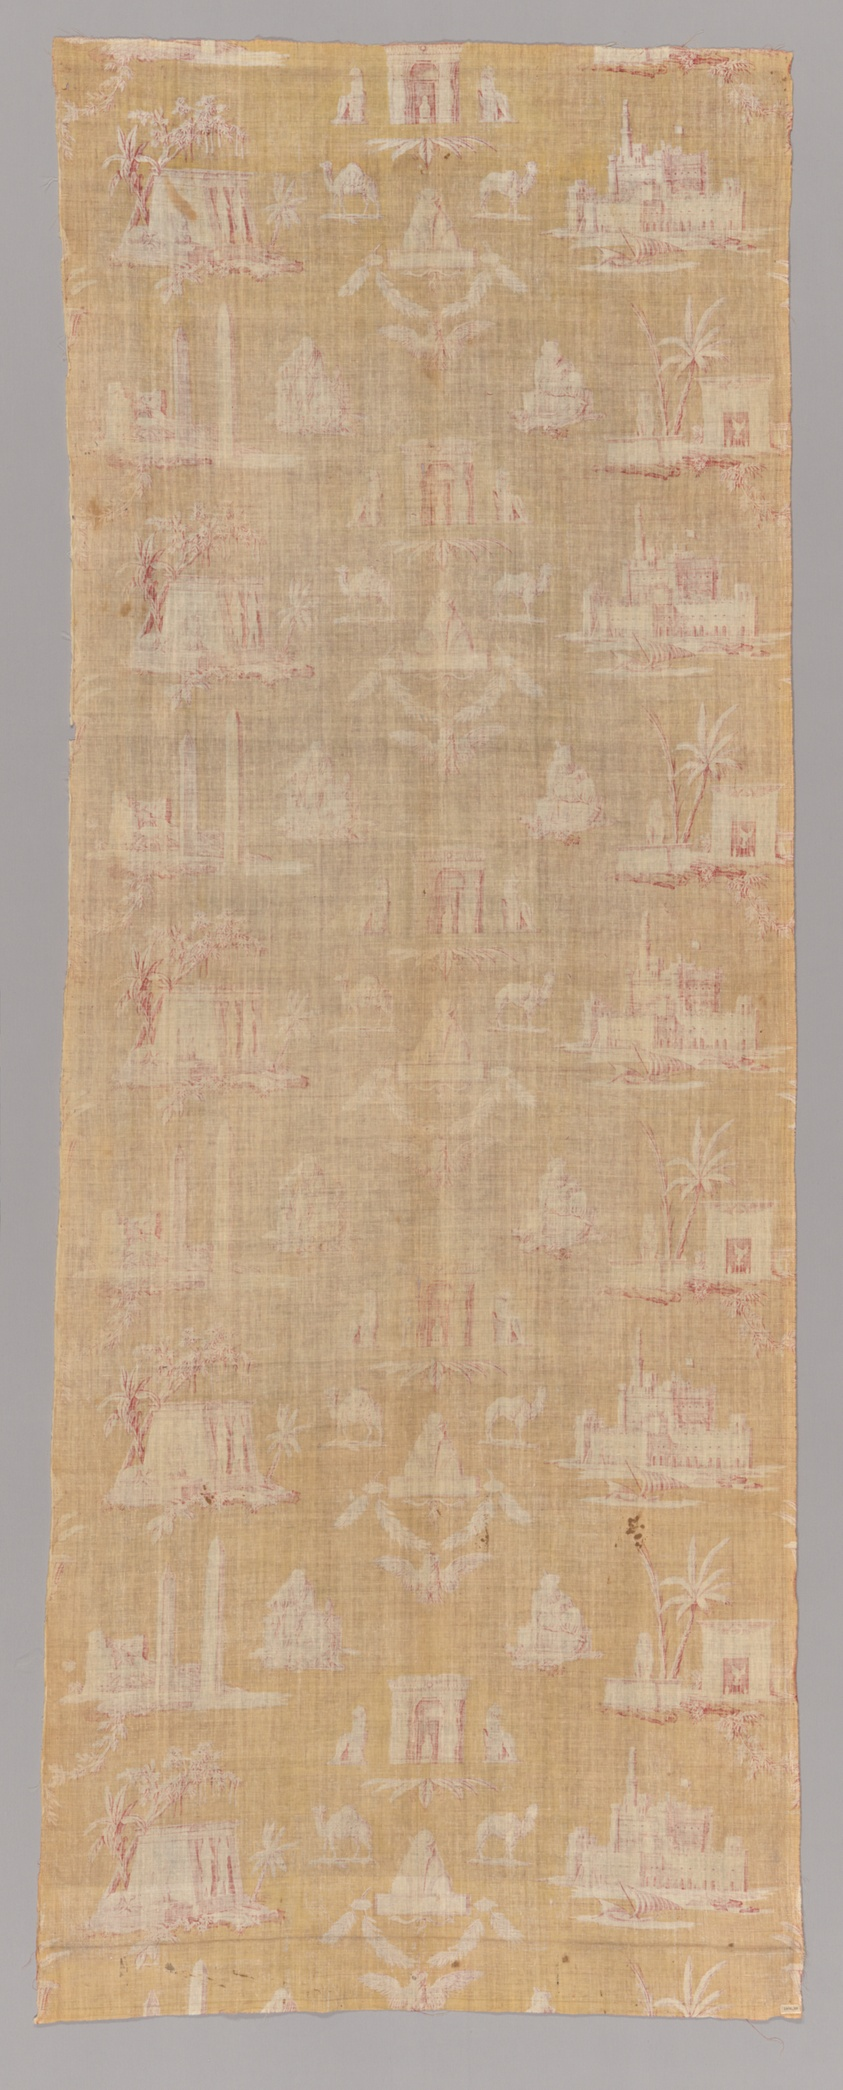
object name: Textile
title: Les Monuments d'Egypte (The Monuments of Egypt) (Furnishing Fabric)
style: egyptian revival, jouy-en-Josas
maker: Designed by Jean Baptiste Huet (French, 1745–1811) after engravings by Pagelet (French) and others after paintings by Louis François Cassas (French, 1756–1827); Manufactured by Christophe-Philippe Oberkampf (naturalized French, 1738-1815), Oberkampf Manufactory (French, 1760-1843); Jouy-en-Josas, France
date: c. 1800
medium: Cotton, plain weave; engraved roller and block printed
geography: Jouy-en-Josas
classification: weaving - printed; textile; furnishing textile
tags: Egypt, buildings, sphinxes, cleopatra, obelisks, statues, pyramid, animals